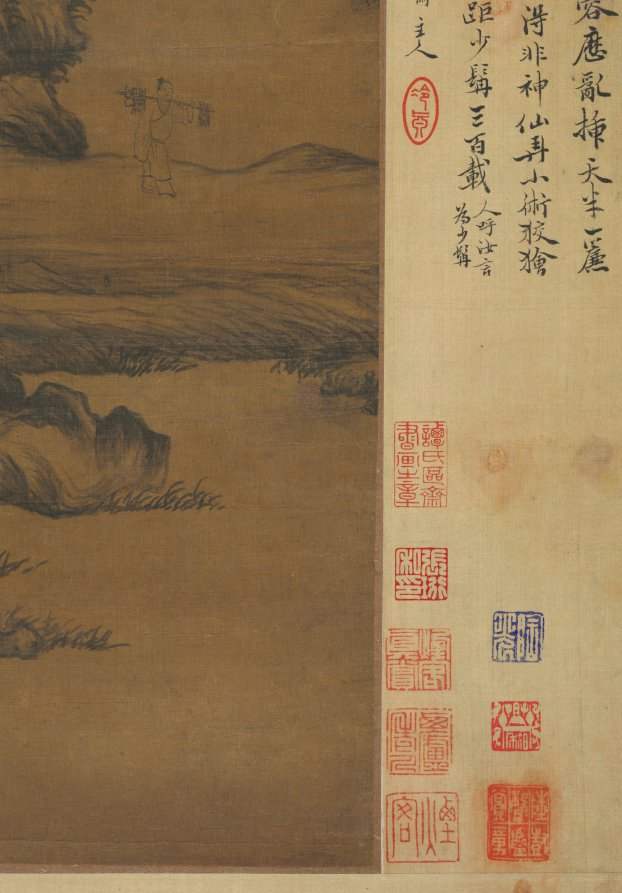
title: The Woodcutter of Luofu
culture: China, Yuan dynasty (1271-1368)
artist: Chen Ruyan (Chinese, c. 1331–1371)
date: 1366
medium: Hanging scroll; ink on silk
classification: Painting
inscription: 至正二十六年（1366）正月望後廬山汝言為思齊斷事寫羅浮山樵圖。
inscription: 2 colophons and 18 additional seals: 5 seals of Wang Shimin 王時敏 (1592–1680); 2 seals of Gong Xianglin 龔翔麟 (1658–1733); 1 colophon, dated 1684, of Yan Shengsun 嚴繩孫 (1623–1702); 1 colophon and 1 seal of Huang Ren (1683–1768); 2 seals of Lu Shusheng 陸樹聲 (3rd son of Lu Xinyuan 陸心源); 2 seals of T'ao Kuang; 1 seal of Tan Jing 譚敬 (20th c.); 3 seals of Zhang Heng 張珩 (1915–1963); 2 seals unidentified.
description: This landscape illustrates the traditionalism of Chinese painting: while the brush manner is novel, the composition is based on early Song dynasty (960-1127) models. The soft raveling brushstrokes and lumpy rock shapes are characteristic of the new 14th-century stylistic expression.